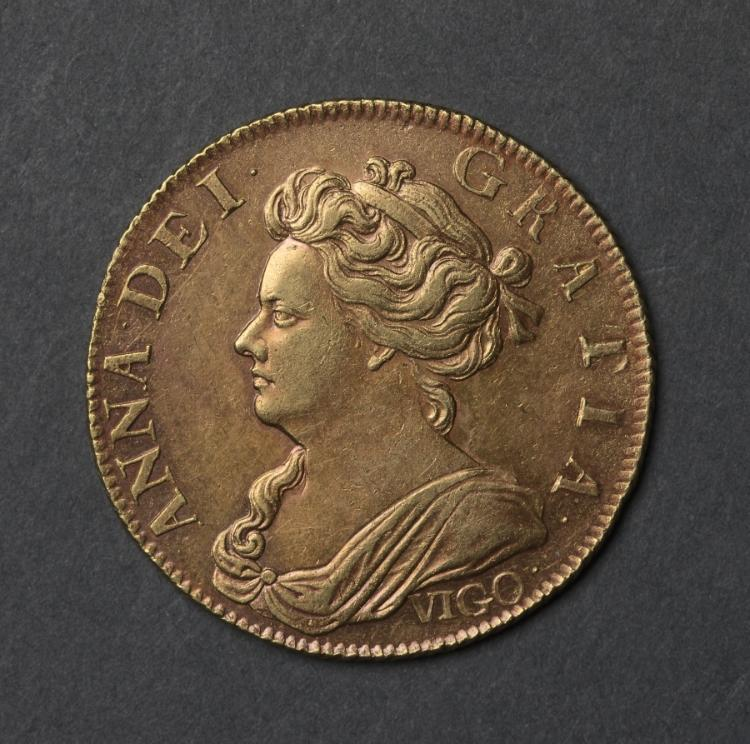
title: Guinea: Anne (obverse)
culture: England, Anne, 1702-1714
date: 1703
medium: gold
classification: Coins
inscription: ANNA.DEI. GRATIA VIGO